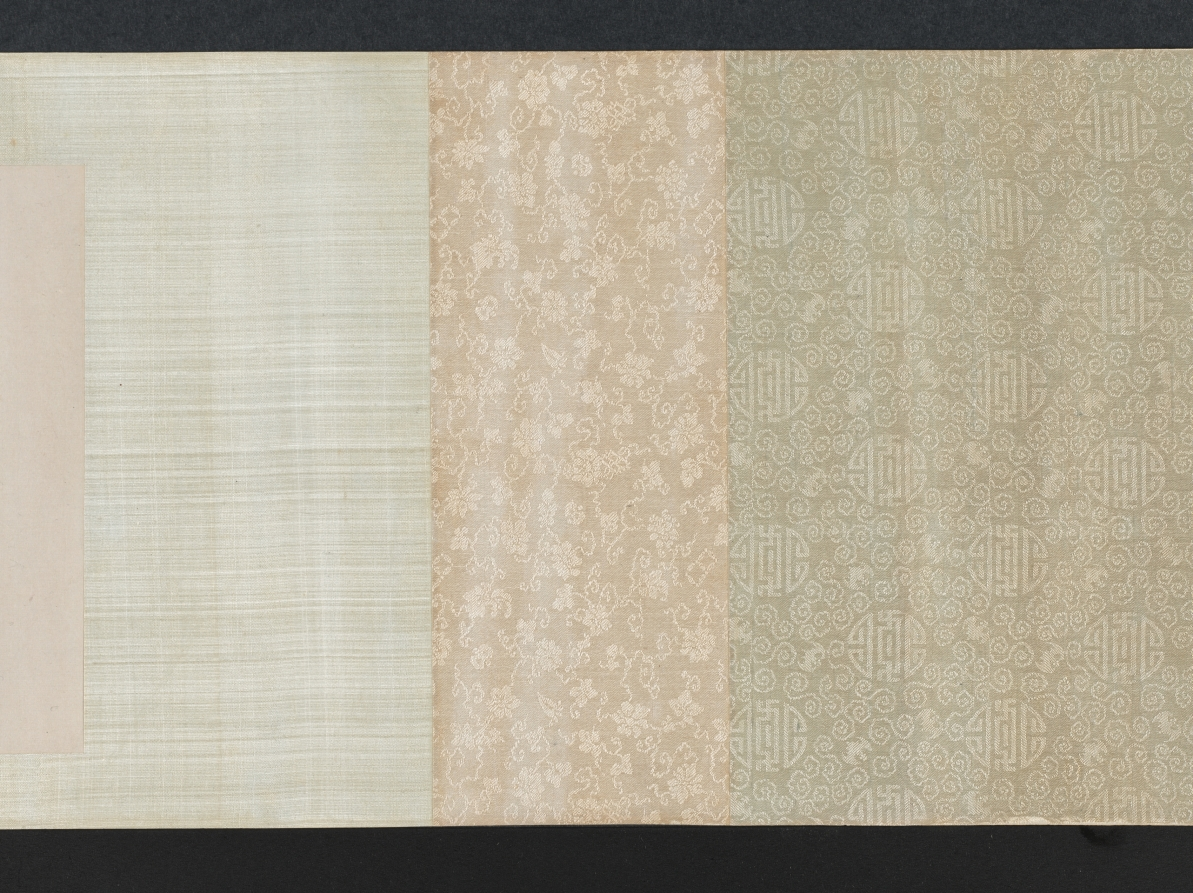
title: Saying Farewell at Xunyang (Song of the Pipa)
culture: China, Ming dynasty (1368–1644)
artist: Wen Boren (Chinese, 1502–1575)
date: 1500s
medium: handscroll, ink and color on paper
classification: Painting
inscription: "潯陽送客圖" 五峰山人文伯仁寫于停雲館中 [印] 文伯仁; 五峰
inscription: 2 colophons and 9 additional seals: 1 transcription of "Pipa xing 琵琶行” (Song of Pipa) and 3 seals of Zhu Yizun 朱彜尊 (1629-1709); 2 seals of Wu Rongguang 吳榮光 (1773-1843); 1 colophon, dated 1826, and 3 seals of Wu Xijia 吳錫嘉 (mid-1700s)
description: This handscroll depicts The Song of the Pipa, a poem by Bai Juyi 白居易 (772–846) written after the poet’s encounter with a pipa player on the Yangzi River. Expelled from her home city when her beauty and fame had faded, she played for the poet at night. Her musical performance and tragic life story resonated with Bai Juyi, who had just been demoted and exiled from life at court himself. The hazy, vast view and pale color tonalities of this painting illustrate these feelings of endless sadness, having lost one’s sense of purpose in life.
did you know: Wen Boren depicted the chilly autumn water with a fishnet pattern.